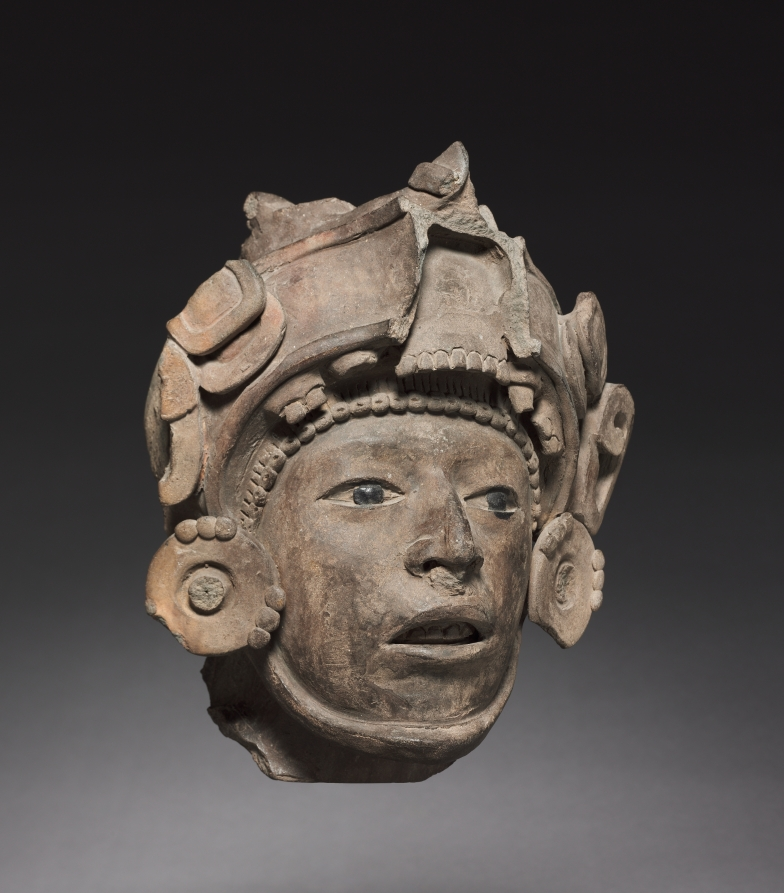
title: Head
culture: Mexico, Classic Veracruz, 7th-10th Century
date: c. 600–900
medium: earthenware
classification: Sculpture